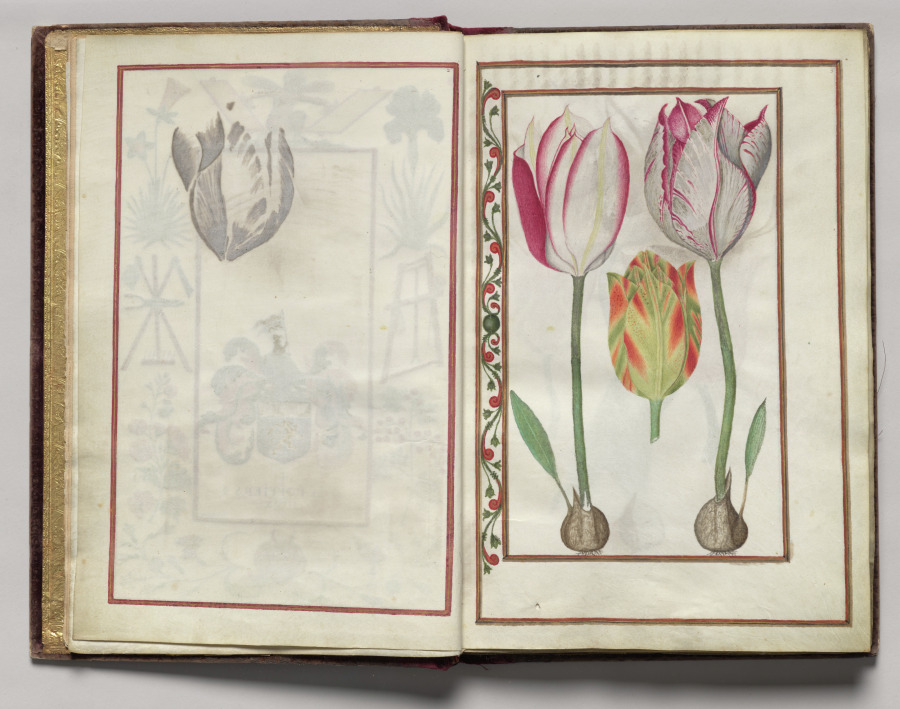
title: Border, folio 1 (verso), from Florilegium (A Book of Flower Studies)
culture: France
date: 1608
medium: watercolor, ink, silver and gold over occasional traces of pencil, on vellum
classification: Bound Volume